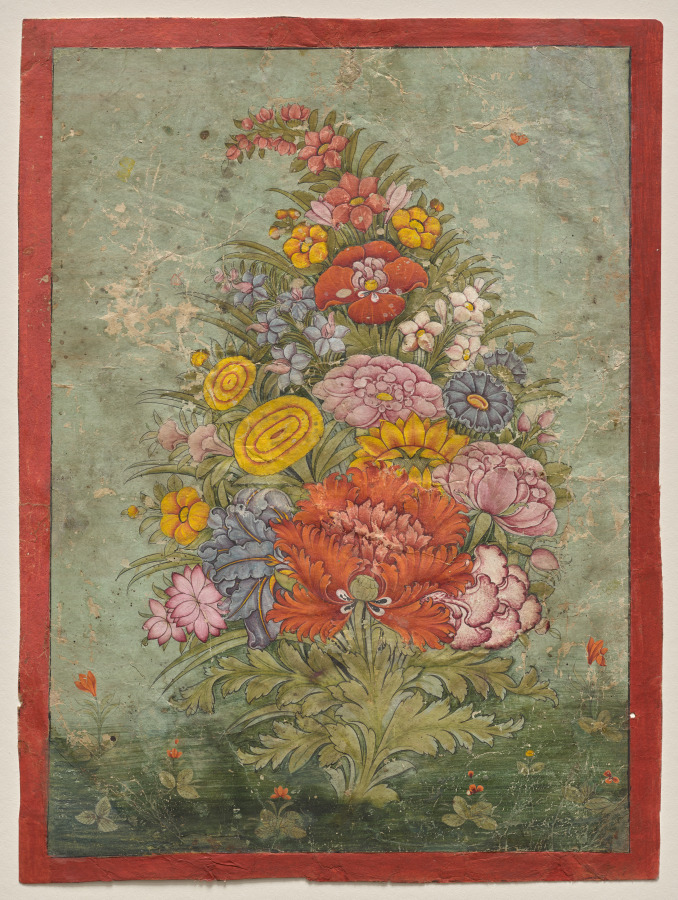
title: Still Life: Bouquet of Flowers Emerging from the Grass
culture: Northwestern India, Rajasthan, Rajput Kingdom of Bundi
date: c. 1750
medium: gum tempera on paper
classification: Painting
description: Studies of flower arrangements in the European manner became a popular subject in Indian miniature painting during the reign of Mughal emperor Jahangir (reigned 1605–27). Inspired by imported prints, Indian artists rendered them in Mughal fashion. Here, in a painting made at a Rajasthani court, the entire bouquet grows magically out of the ground from a single stem.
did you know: The central flower is a scarlet-colored poppy, famed for yielding opium.